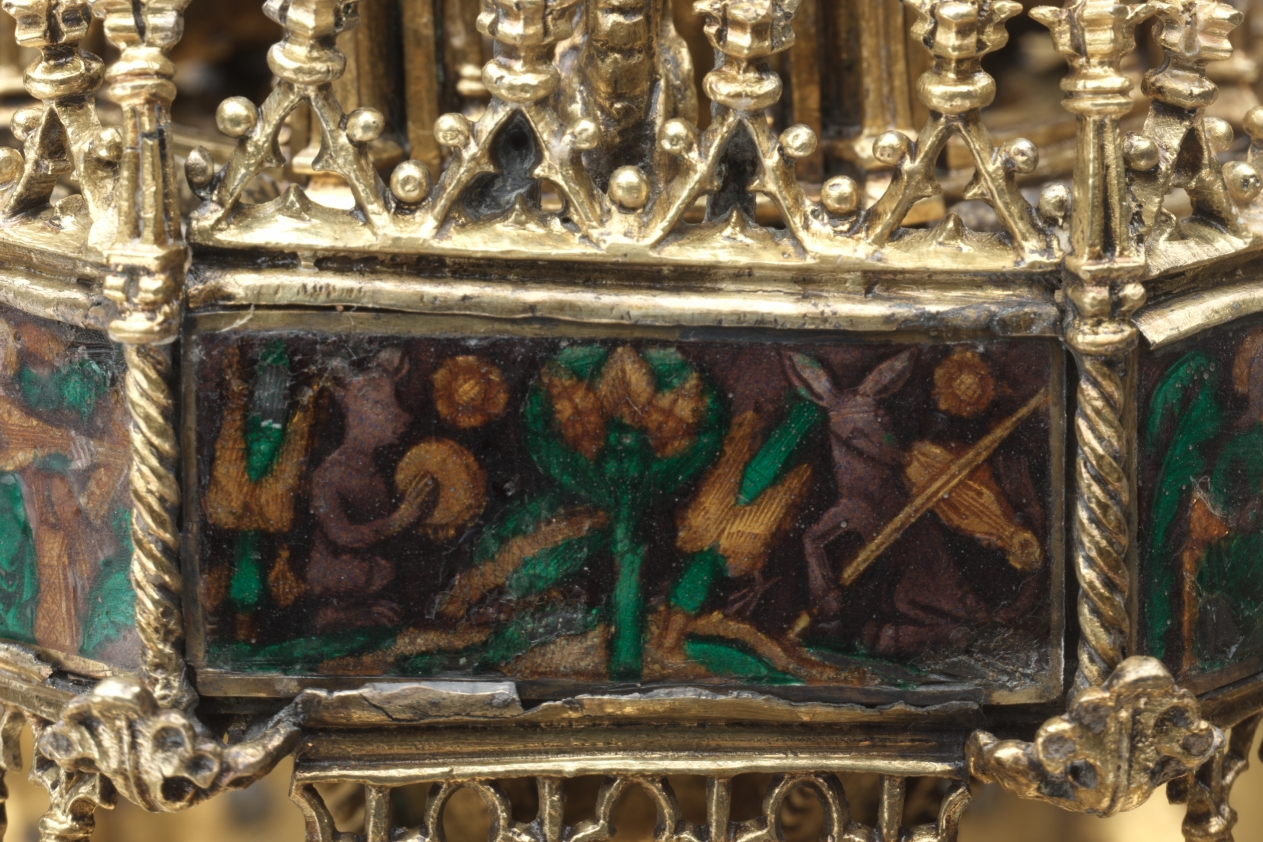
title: Table Fountain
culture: France, Paris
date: c. 1320–40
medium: gilt-silver and translucent enamels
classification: Metalwork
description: Conceptually and stylistically, this object is beyond all else a piece of Gothic architecture in miniature with vaults, pinnacles, columns, and traceried arches. Though the artist who created it is unknown, he was unquestionably inspired by the great Gothic buildings of his time. The table fountain is a three-tiered assembly combining cast elements with bent sheets of gilt-silver. To these have been attached a series of enamel plaques representing grotesque figures, some of which play musical instruments. Water wheels and bells were added to capture motion and sound. The rich detail, precious materials, and involved ornamentation of this deluxe object suggest it would have been expensive to produce and highly treasured by its original owner, someone of high status, and would have been deployed as an object of spectacle. This is the most complete example of its type known to survive from the Middle Ages. Medieval inventories reveal that small fountains like this, often taking various forms, and generally made from precious metals, once existed in large numbers, thus making the Cleveland table fountain an extremely rare object.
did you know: This fountain with its minute architectural details and finely made enamel plaques displayed the wealth and refinement of the owner as it entertained his guests. Imagine hearing the ringing of the tiny bells when this fountain was in use.